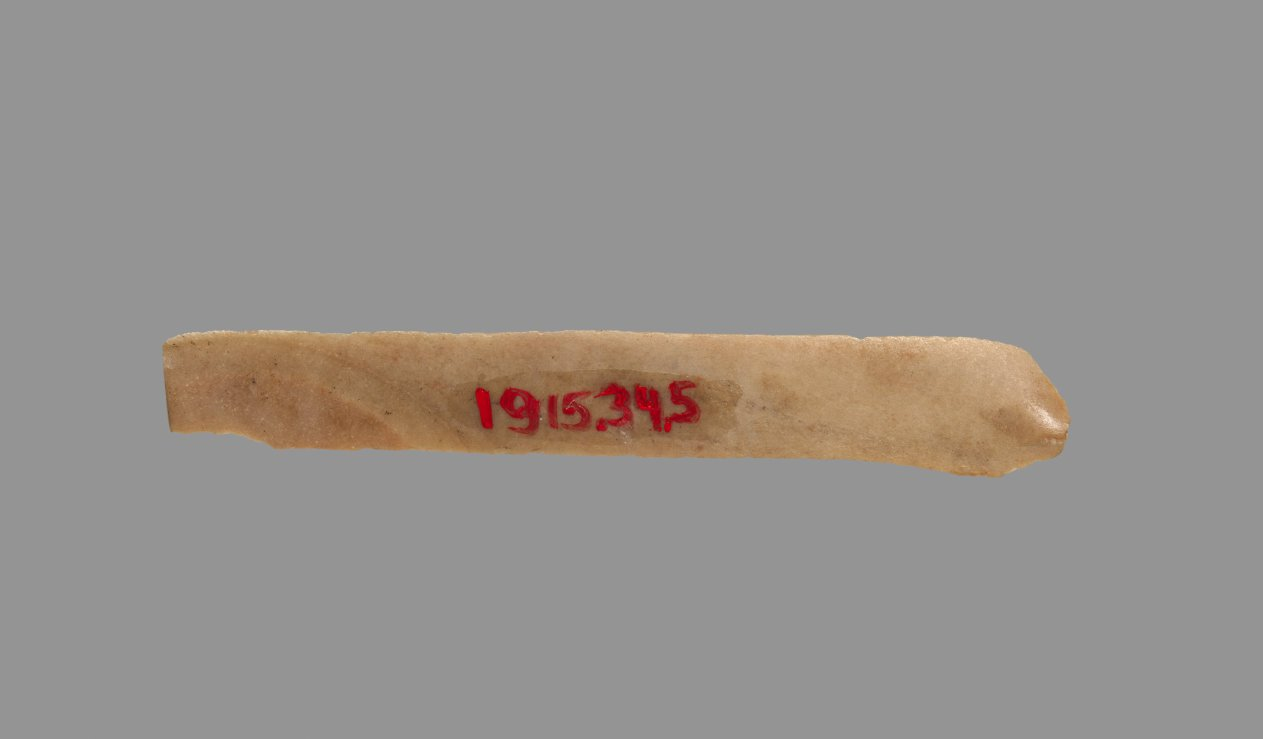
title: Sickle Blade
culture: Egypt, Middle Kingdom (2040–1648 BCE), Dynasty 12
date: 1980–1801 BCE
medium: flint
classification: Implements